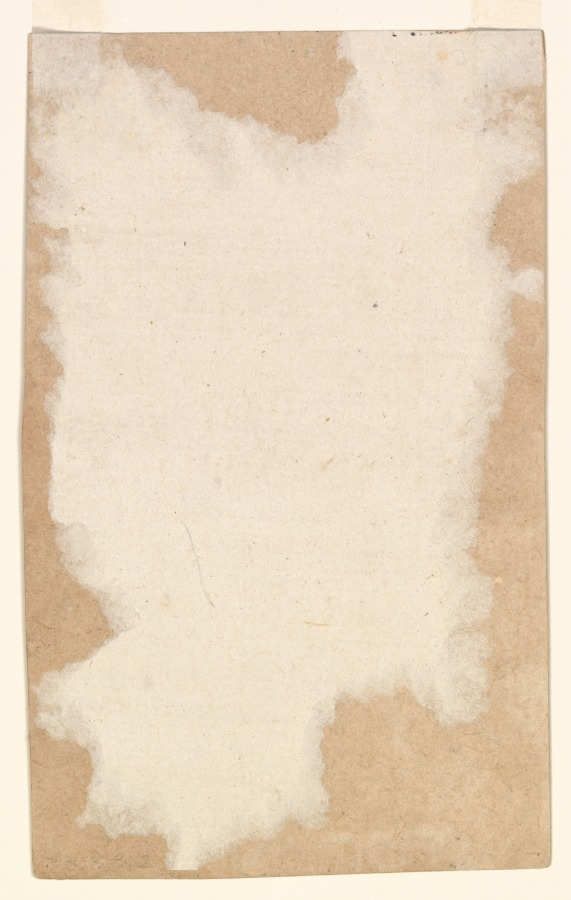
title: The Holy Family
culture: Northern India, Mughal court, early 17th century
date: c. 1620s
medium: Gum tempera and gold on paper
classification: Painting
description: This painting of Joseph, the Virgin Mary, and the infant Jesus is based on European sources, but it also contains several details that are specifically Indian. For example, although Mary is dressed in classical European-style robes, she is adorned with jewelry of rubies and emeralds, the preferred gems of Mughal royalty. Her fingertips are also red with henna, and she wears a bindi on her forehead. The detailed rendering of the vase evokes the Catholic St. Francis as well as Indian worship of the sun. The vessel itself points to the appreciation of Chinese blue-and-white ware imported from imperial Ming-dynasty kilns to the court of Jahangir (reigned 1605–27).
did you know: With hennaed fingertips Mary holds the vase so baby Jesus doesn’t tip it over.